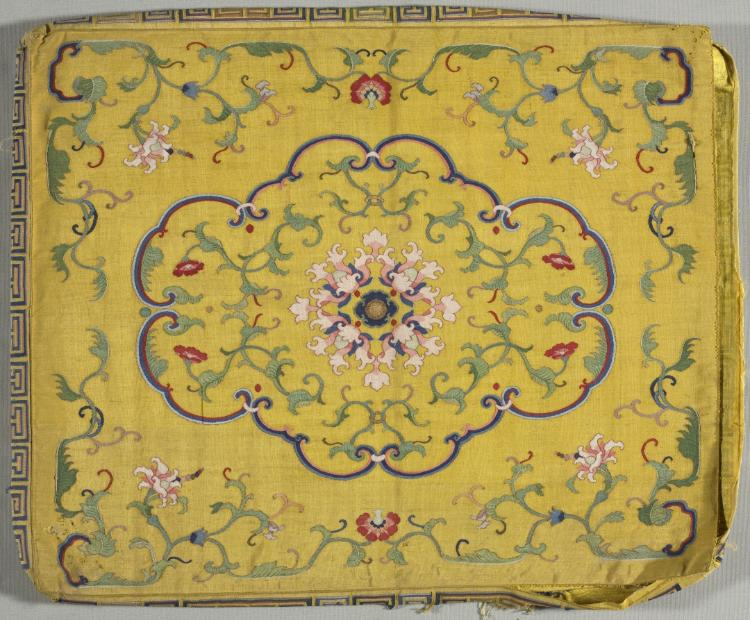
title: Cushion Cover (one of a set of four)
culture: China, Qing dynasty (1644-1911)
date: 1700s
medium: silk, metallic thread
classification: Textile